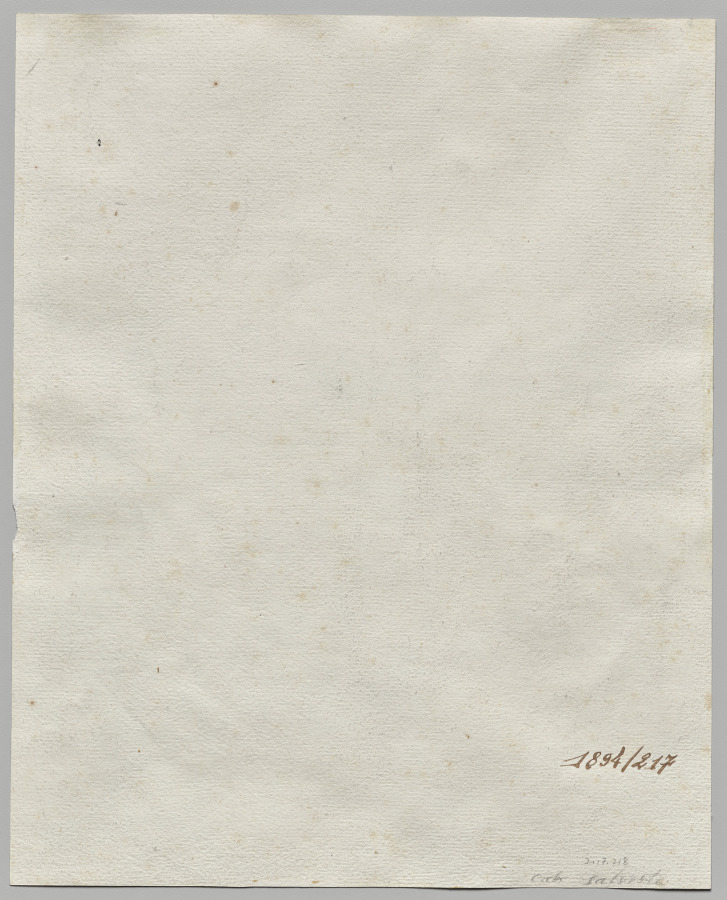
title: Seated Woman Holding a Bird Cage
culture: France, 18th century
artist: copy after François Boucher (French, 1703–1770)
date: probably 18th century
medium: Black chalk with stumping (in drapery) and wet work (hair and eyes) and red and white chalk, with blue chalk and traces of yellow chalk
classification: Drawing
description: This chalk drawing originated from the studio of François Boucher. Although it bears Boucher’s signature—seen at lower right—the image was likely executed by a member of the master’s shop, rather than Boucher himself. Despite the anonymity of the draftsman, the image nonetheless reproduces one of Boucher’s designs and was therefore considered a work by the master.